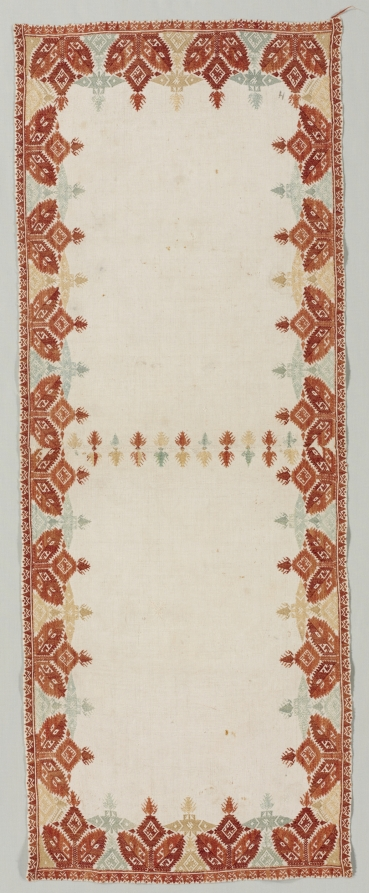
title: Pillow Cover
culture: Greece, Cyclades Islands, Amorgos, 18th century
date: 1700s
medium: embroidery: silk on linen tabby ground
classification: Embroidery